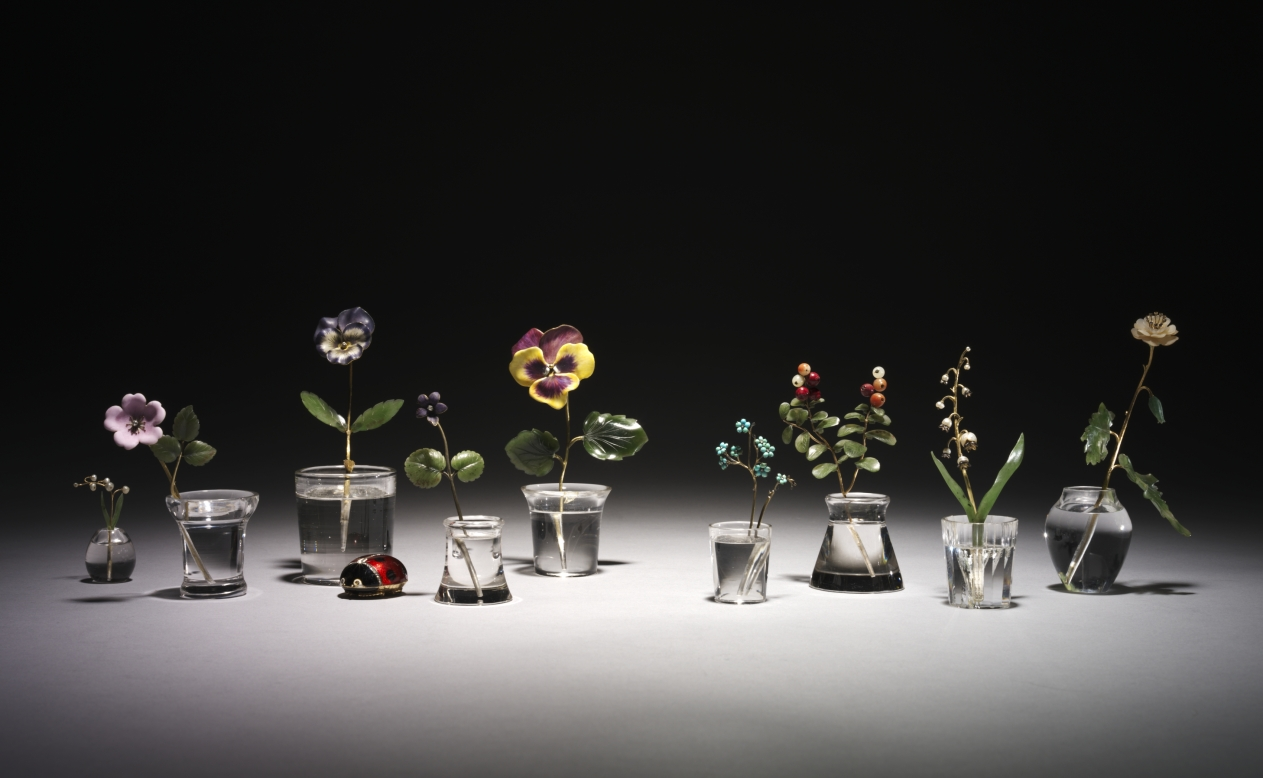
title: Flower Study of a Lily of the Valley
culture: Russia, St. Petersburg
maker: House of Fabergé (Russian, 1842–1918)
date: c. 1885–1915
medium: pearls, diamonds, jade, rock crystal, silver, gold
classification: Miscellaneous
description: This flower study resembles a stem of lily-of-the-valley. Fabergé’s inspiration for his flower studies is said to have come from the floral brooches of precious stones that were made in the 1700s for Catherine the Great as well as from the Japanese art of flower arranging, known as ikebana. Small and delicate, Fabergé’s flower studies were given as intimate gifts to friends by the tsarina and others in the court. She also liked to take them around to wherever the imperial family was residing as a reminder of spring during the harsh Russian winters.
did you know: The stems of Fabergé’s flower studies are set into little basins carved from rock crystal to resemble pots of water.